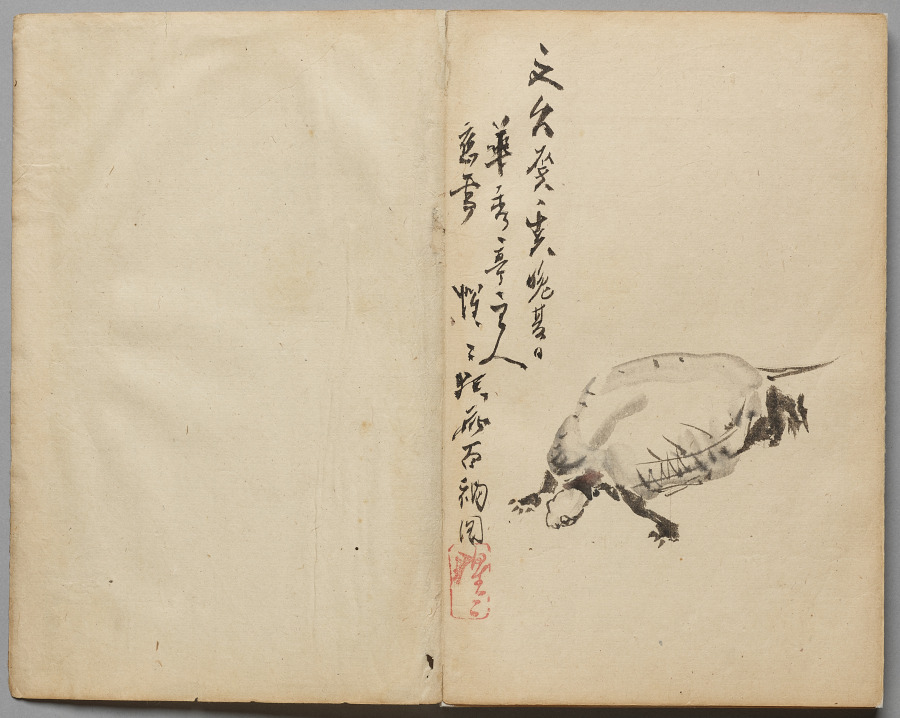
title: Tortoise from Sketch Album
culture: Japan, Edo period (1615–1868) to Meiji period (1868–1912)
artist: Kawanabe Kyōsai (Japanese, 1831–1889)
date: mid- late 1800s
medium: Accordion-style book of 26 double-leaves; ink and color on paper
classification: Bound Volume